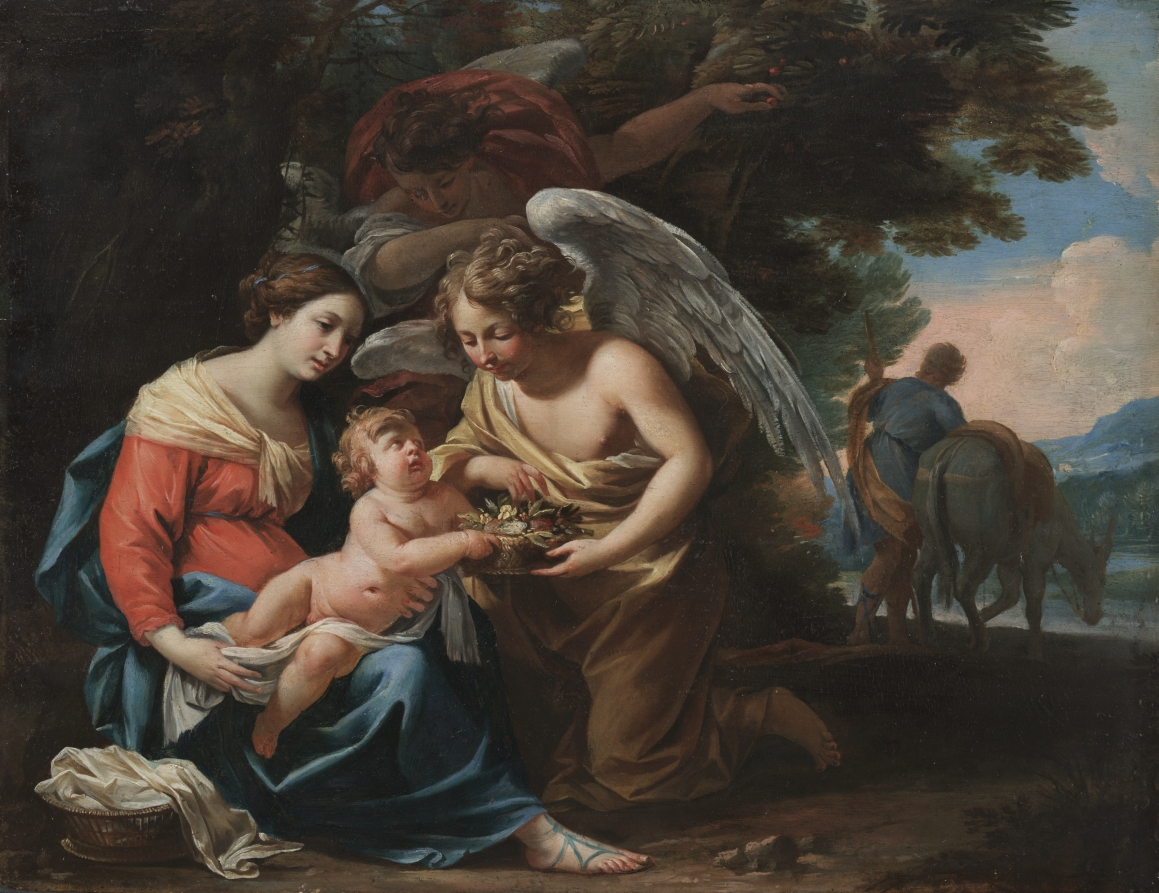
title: Rest on the Flight into Egypt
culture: France, 17th century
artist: Charles Poërson (French, 1609–1667)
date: c. 1640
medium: oil on wood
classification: Painting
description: Formerly ascribed to the French painter Simon Vouet (1590-1649), Rest on the Flight into Egypt has only recently been attributed to Poerson, a collaborator and follower of Vouet. Intended to be a small devotional picture, this painting on oak panel depicts a quiet scene of the Holy Family resting; the Virgin Mary sits while an angel brings the plump young Christ Child fruit, and St. Joseph leads their donkey away to graze. The delicate pinks and blues and the transparent treatment of light and shadow create a gentle domestic atmosphere, characteristic of Vouet's Italian-influenced work.